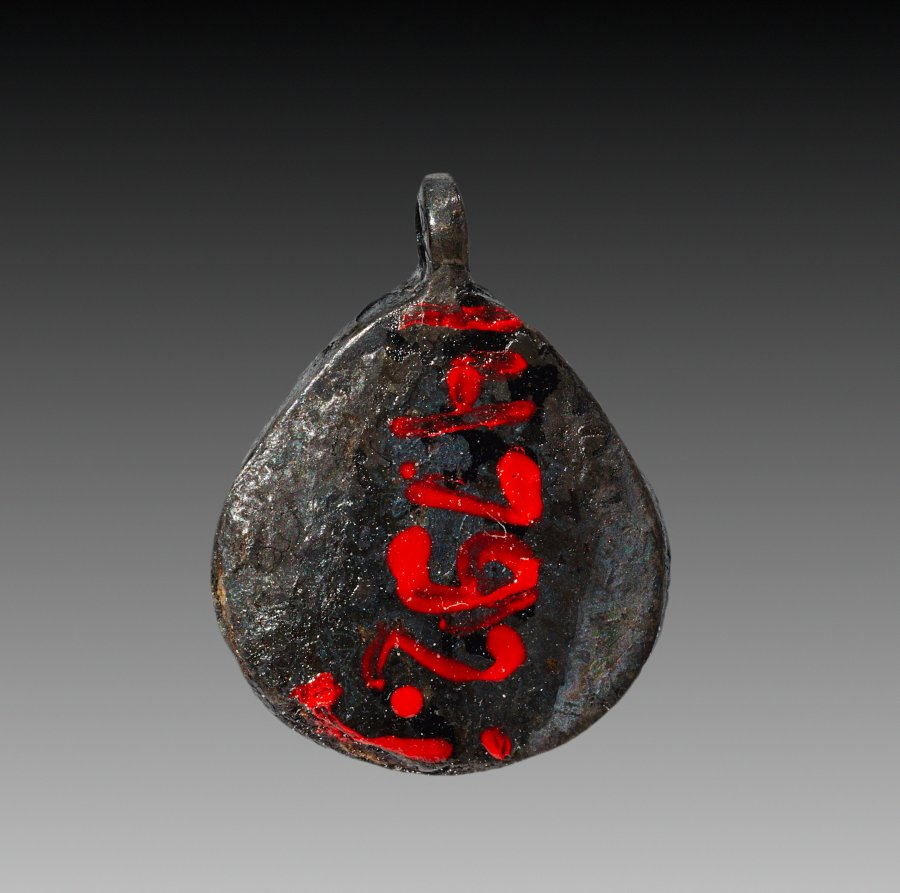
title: Oyster-Shell Pendant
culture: Egypt, Middle Kingdom (2040–1648 BCE), Dynasty 12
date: 1980–1801 BCE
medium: carnelian and silver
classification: Jewelry